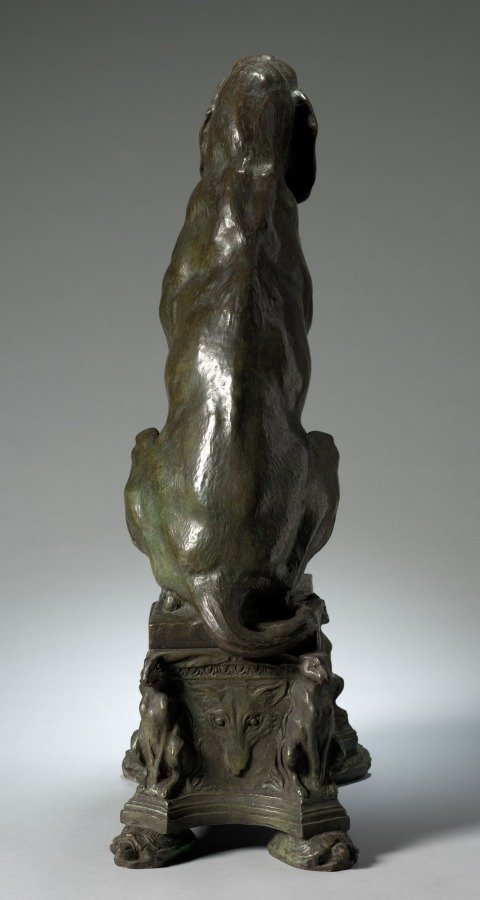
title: Hound (1 of 2)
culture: America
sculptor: Charles Cary Rumsey (American, 1879–1922)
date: 1912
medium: bronze andiron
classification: Sculpture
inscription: Signed on plinth: © C. C. Rumsey